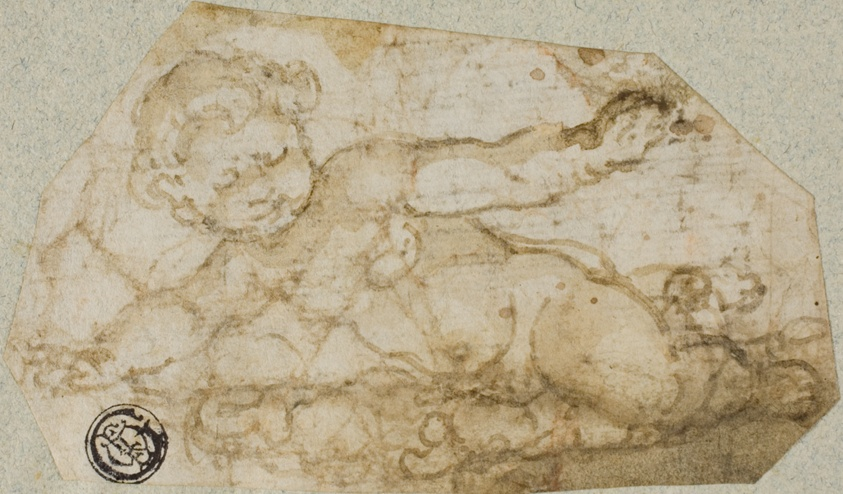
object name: Drawing and Watercolor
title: Putto with Garland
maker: Andrea Lilio (Italian, 1555-1642)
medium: Pen and brown ink with brush and brown wash, on ivory laid paper, laid down on blue laid paper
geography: Italy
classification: drawings (visual works); prints and drawing